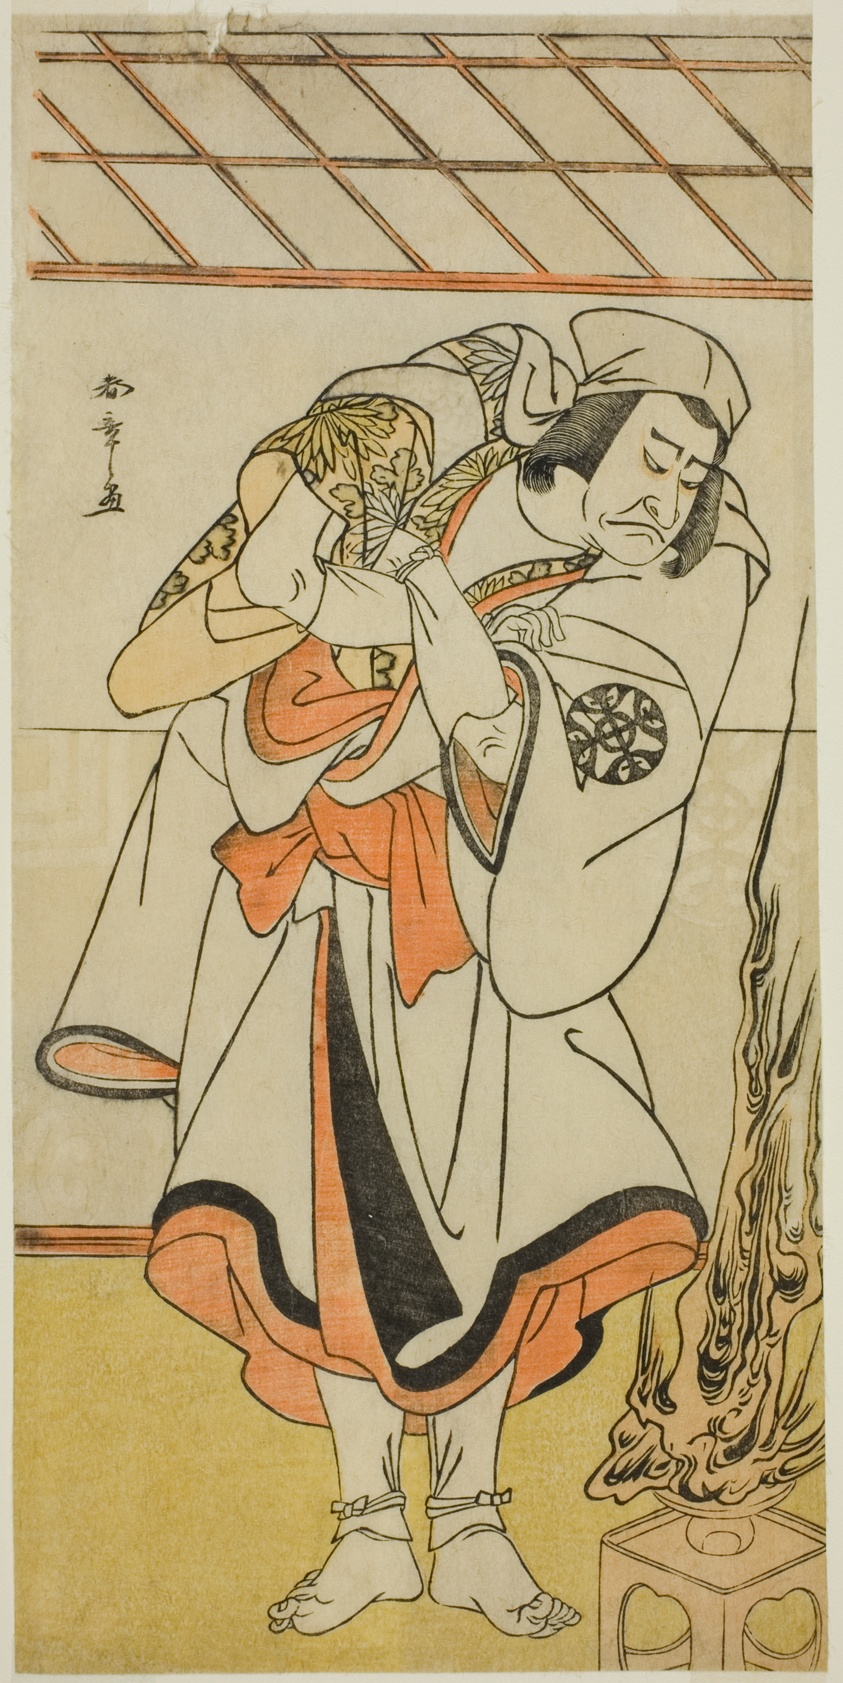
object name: Print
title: The Actor Nakamura Nakazo I as Chinzei Hachiro Tametomo Disguised as an Ascetic Monk, in the Play Kitekaeru Nishiki no Wakayaka, Performed at the Nakamura Theater in the Eleventh Month, 1780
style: Japanese (culture or style)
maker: Katsukawa Shunsho 勝川 春章; Japanese, 1726-1792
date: c. 1780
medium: Color woodblock print; hosoban; left sheet of diptych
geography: Japan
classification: woodblock print; print; asian art